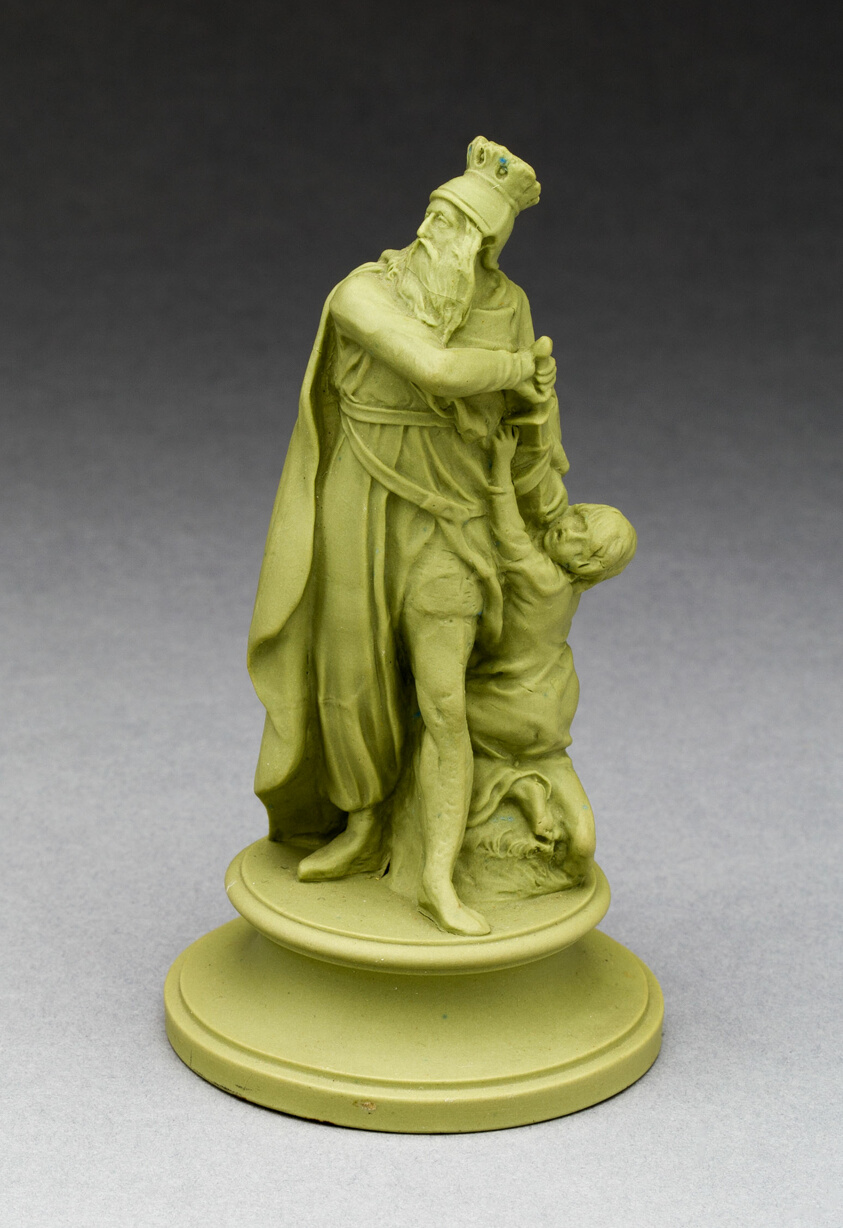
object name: Ceramics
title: Chess Piece: King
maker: Wedgwood Manufactory (England, founded 1759)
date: Late 18th century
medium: Stoneware: green jasperware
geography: Burslem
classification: accessories (object genre); stoneware; european decorative arts; ceramics